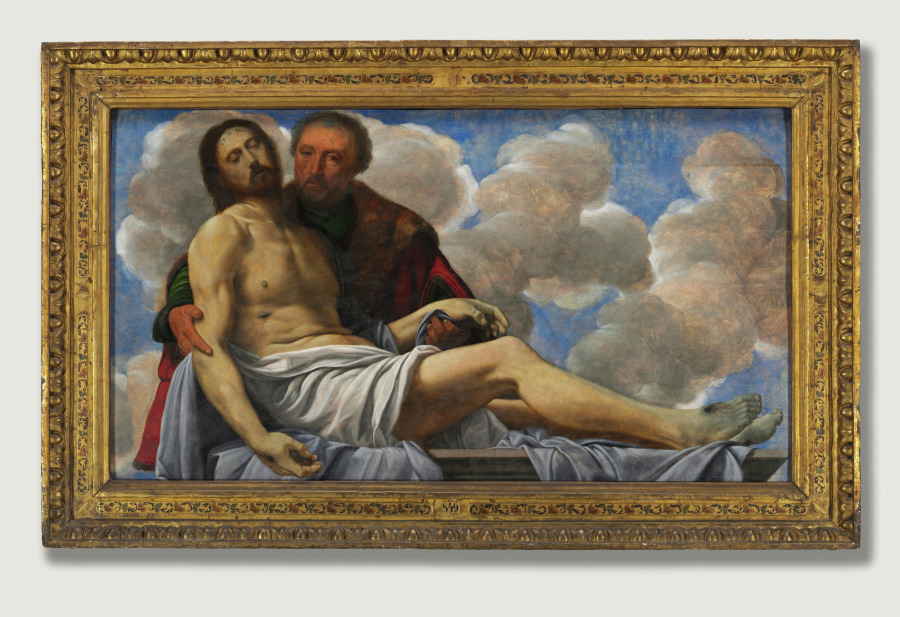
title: Christ with Joseph of Arimathea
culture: Italy, 16th century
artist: Giovanni Girolamo Savoldo (Italian, c. 1480–after 1548)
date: c. 1525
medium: oil on wood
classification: Painting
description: After the Crucifixion, Joseph of Arimathea obtained permission to bury Christ’s body in Joseph’s own tomb. Aside from an amorphous, cloudy sky, Savoldo eliminated the background entirely and reduced the narrative to two monumental figures, brought to the front of the picture plane. These qualities surely had a great impact on Caravaggio, who initially trained in Northern Italy, where Savoldo spent his career. This work originally hung over a large altarpiece, which explains the unusual perspective, the panel’s horizontal shape, and the figures’ position above the viewer.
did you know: This panel originally crowned the largest painting Savoldo ever made for a public setting.